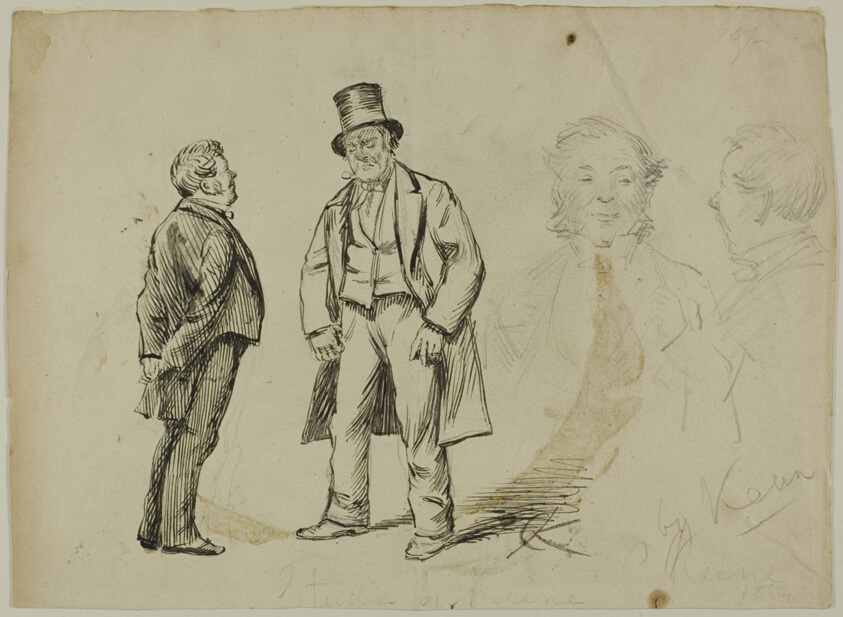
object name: Drawing and Watercolor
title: Sketch of Two Standing Men and Two Portaits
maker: Attributed to Charles Samuel Keene; British, 1823-1891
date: 1870/91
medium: Pen and black ink, over graphite, on tan wove paper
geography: England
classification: pen and ink drawings; drawings (visual works); prints and drawing